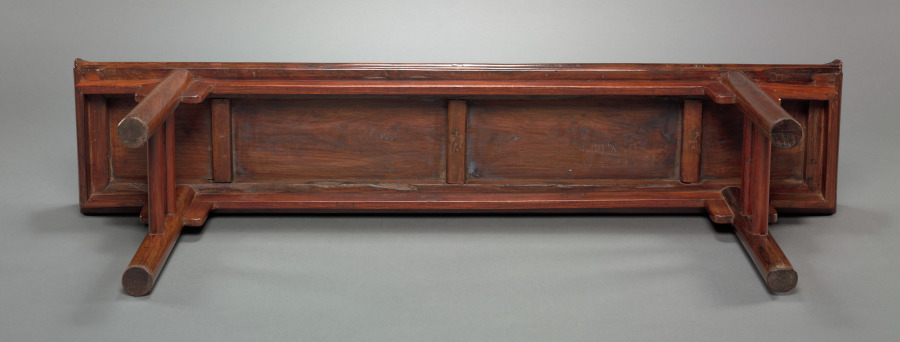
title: Low Table (Anji)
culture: China, Ming dynasty (1368–1644)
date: 1500s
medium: rosewood (huanghuali)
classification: Furniture and woodwork